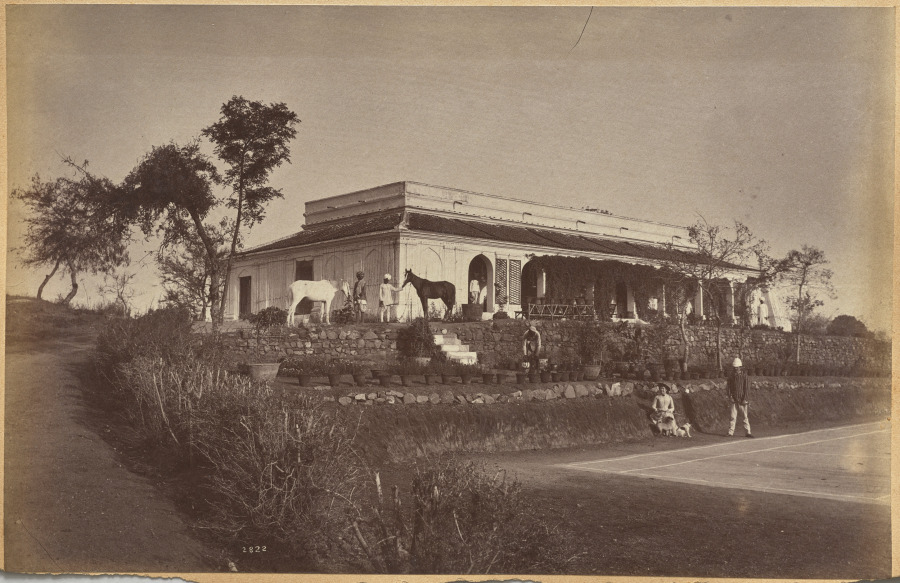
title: Untitled (verso, bottom)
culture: India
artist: Raja Deen Dayal (Indian, 1844–1905)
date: c. 1882–87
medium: albumen print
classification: Photograph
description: These photographs are part of an album, now disassembled, of around 105 photographs taken in India between 1885 and summer 1887 that provide glimpses into the lives of the British colonial elite and royal and upper-class Indians. The museum holds another group of 37 pictures from this album (2016.266), which was probably commissioned by a British civil servant visiting or working in India around 1888 as a personal souvenir of his experiences there.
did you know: Raja Deen Dayal is regarded now, and was considered during his lifetime, to be India’s most important 19th-century photographer.